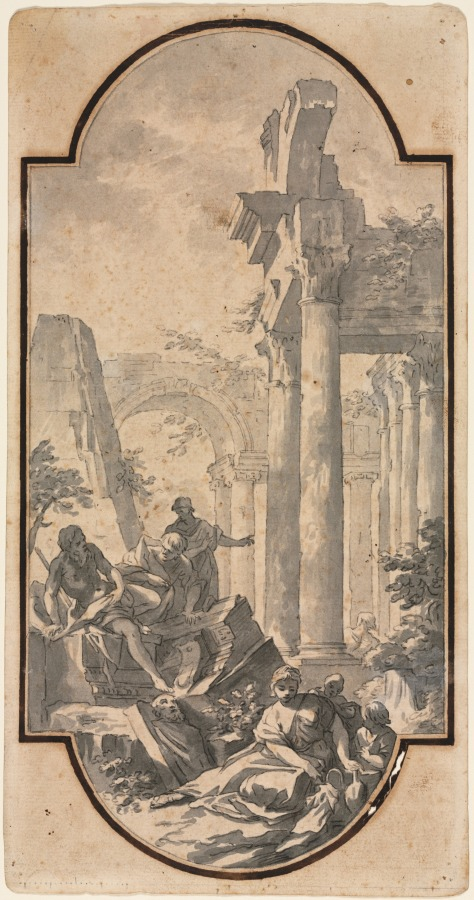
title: Figures Near the Ruins of a Corinthian Temple (recto); Fragment of an Arch (tracing from recto) (verso)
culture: Italy, 18th century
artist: Andrea Locatelli (Italian, 1695–1741)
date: first half 1700s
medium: brush and black and gray wash, over traces of black chalk; framing lines in black chalk, and brown ink (iron gall)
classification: Drawing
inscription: verso: lower left, in graphite: 5 [upside down]